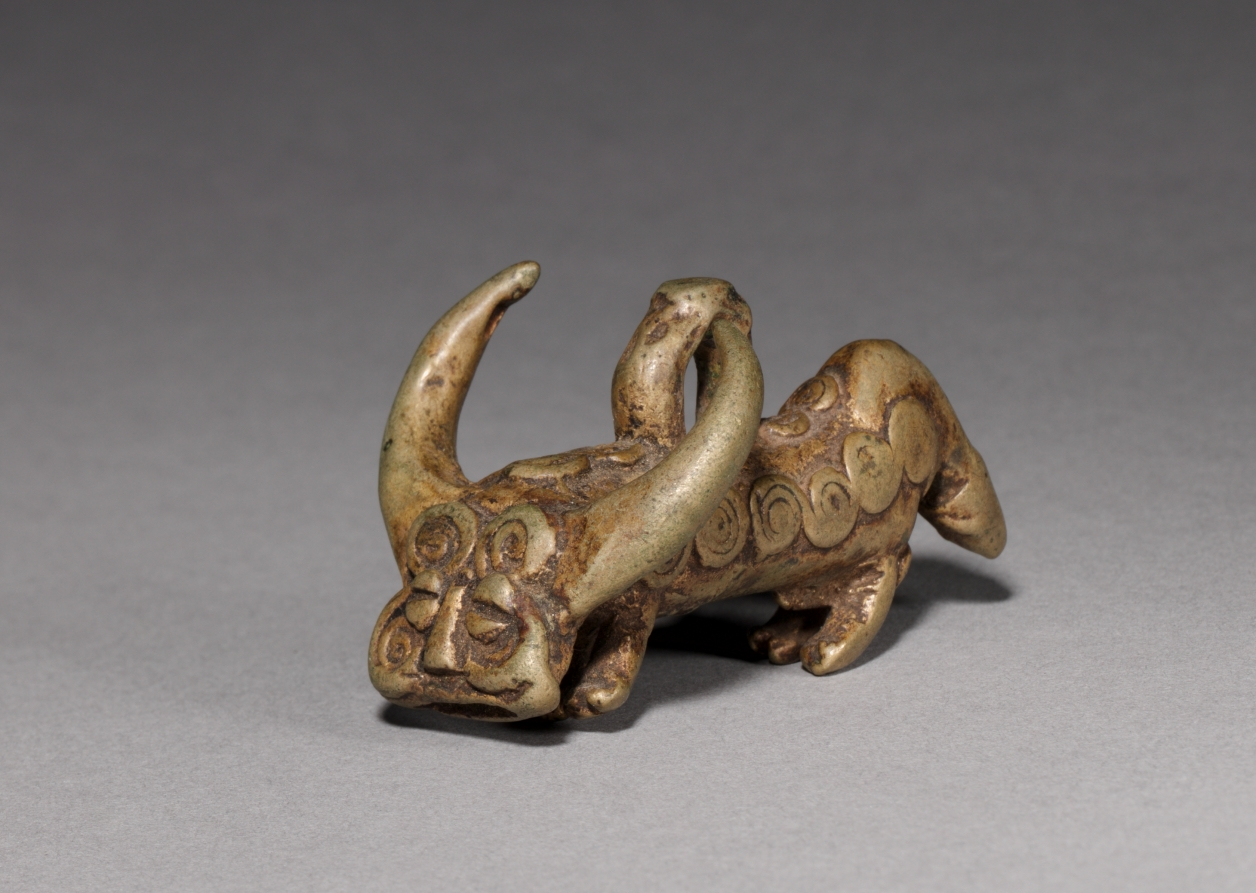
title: Animal Pendant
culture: Western Sudan, Burkina Faso, Tusyan, 20th century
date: 1900s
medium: Copper alloy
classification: Jewelry